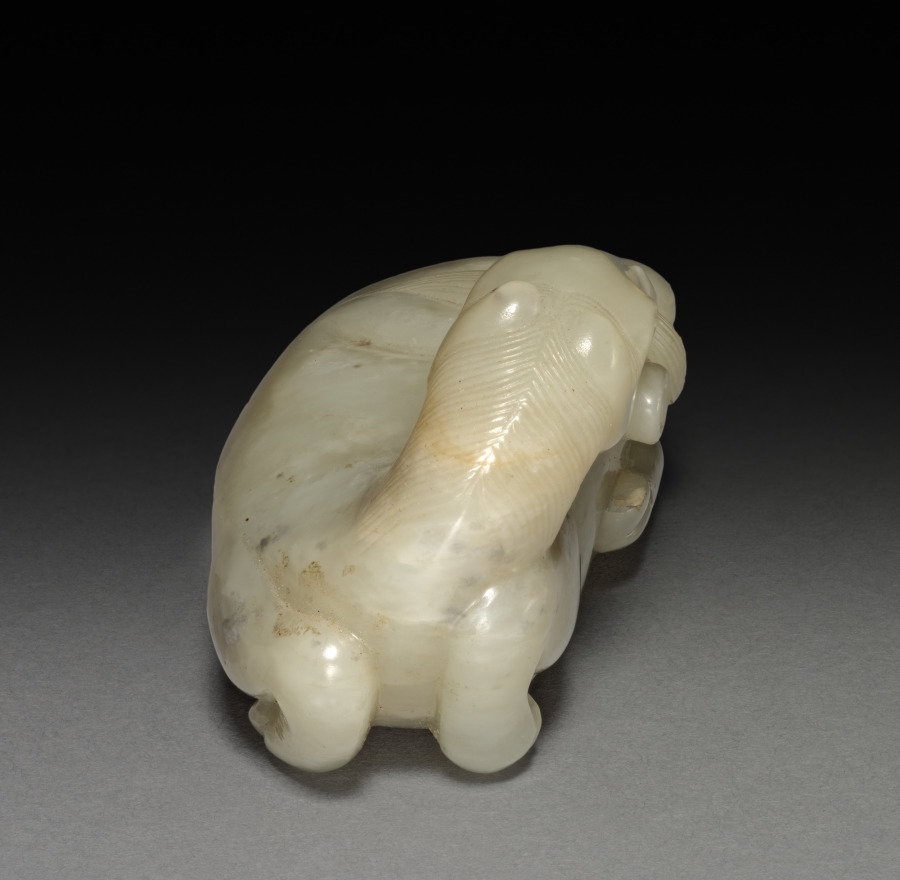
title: Horse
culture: China, Ming dynasty (1368-1644) - Qing dynasty (1644-1911)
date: 1600s or earlier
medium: jade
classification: Jade